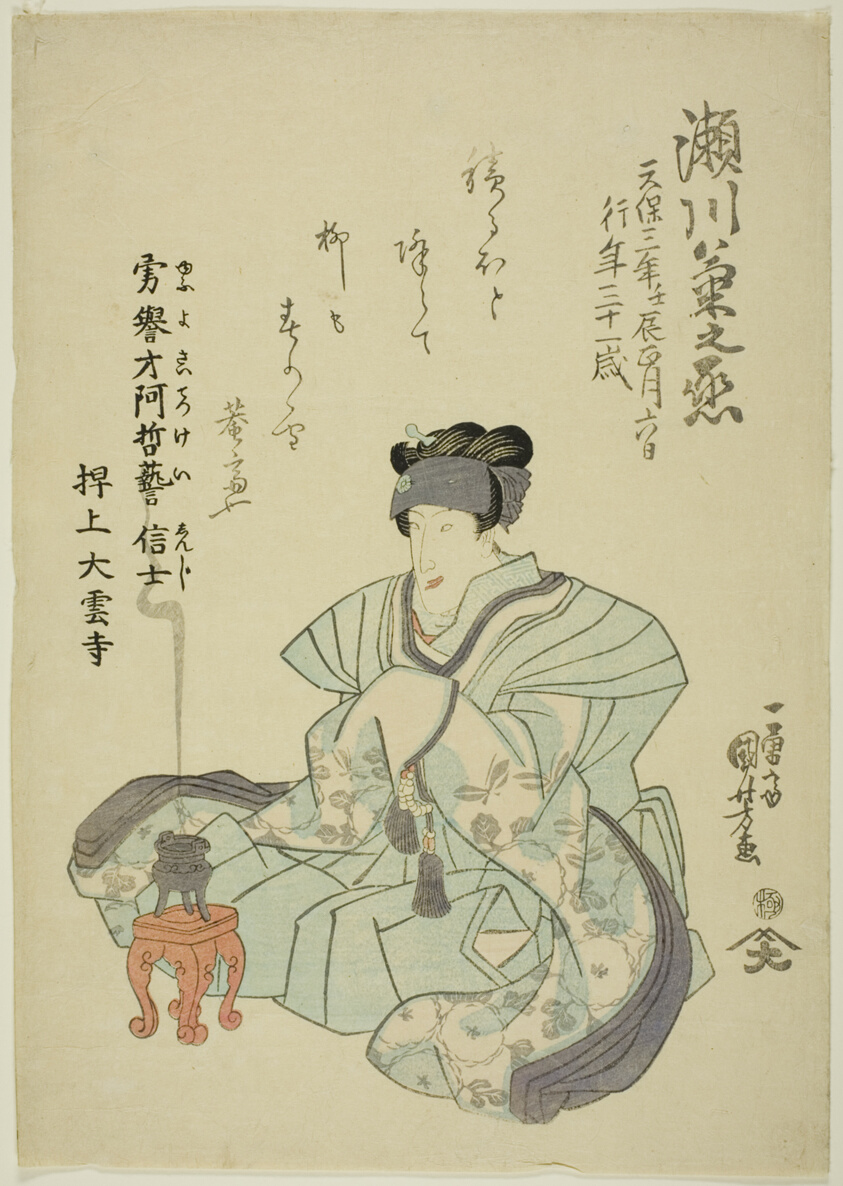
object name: Print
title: Memorial Portrait of the Actor Segawa Kikunojo V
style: Japanese (culture or style)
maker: Utagawa Kuniyoshi (Japanese, 1797-1861)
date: 1832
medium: Color woodblock print; oban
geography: Japan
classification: print; asian art